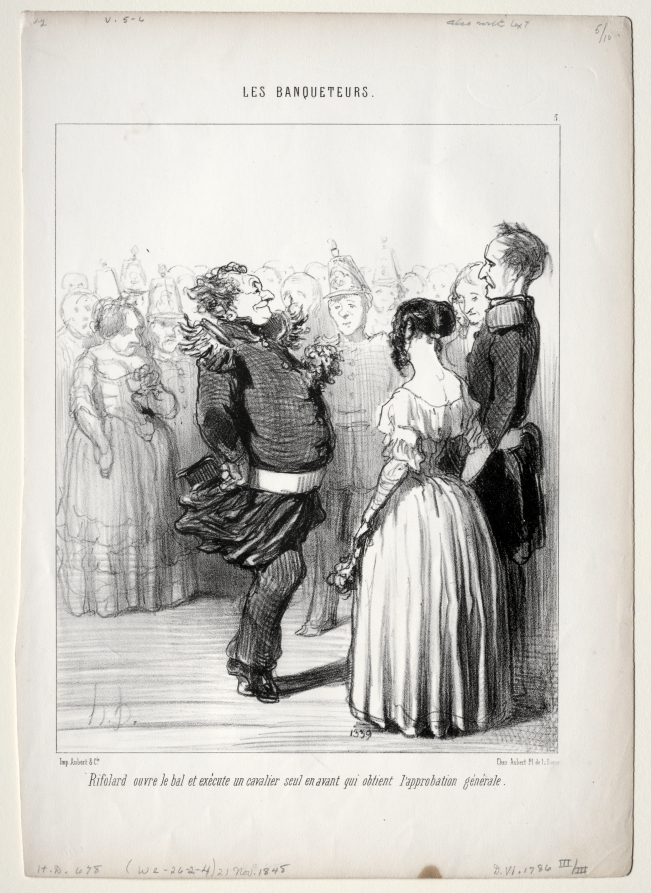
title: Rifolard opens the ball...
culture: France, 19th century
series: The Banqueters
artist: Honoré Daumier (French, 1808–1879)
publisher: Aubert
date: 1848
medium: lithograph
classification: Print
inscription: Above image, printed: LES BANQUETEURS. / 5 ; Below image, printed: -Rifolard ouvre le bal et exécute un cavalier seul en avant qui obtient l'approbation générale.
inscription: Upper margin, in pencil: V-2 / V. 5-6 / also with text 5/10 ; lower margin, printed: Imp. Aubert & Cie. / Chez Aubert, Pl. de la Bourse ; in pencil: H.D. 678 II/II / (We-26-2-4) 21 Nov. 1848 / D. VI.1786 III/III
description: This print was published in Le Charivari (November 21, 1848) as plate 5 from the series The Banqueters.